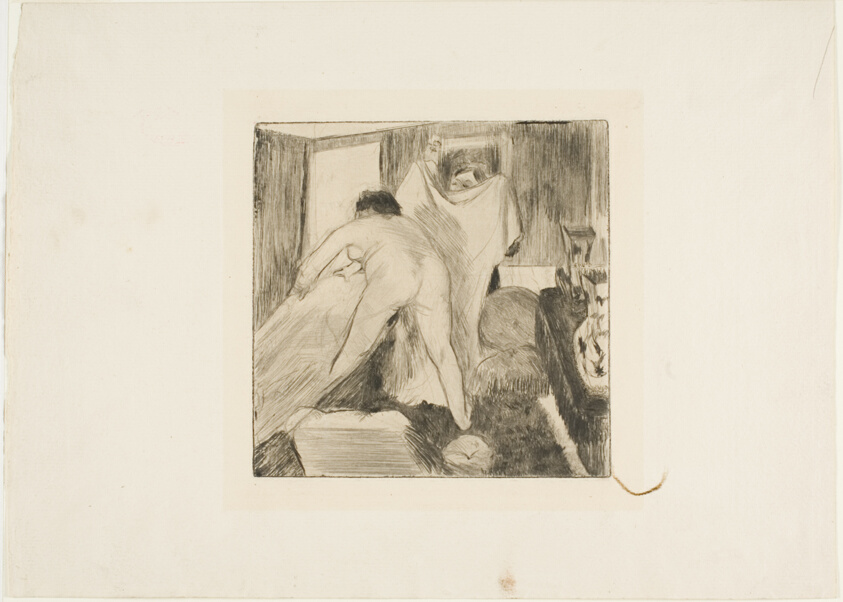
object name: Print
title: Leaving the Bath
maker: Edgar Degas; French, 1834-1917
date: 1879–80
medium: Drypoint and aquatint on cream laid paper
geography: France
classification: drypoint; print; prints and drawing; paper